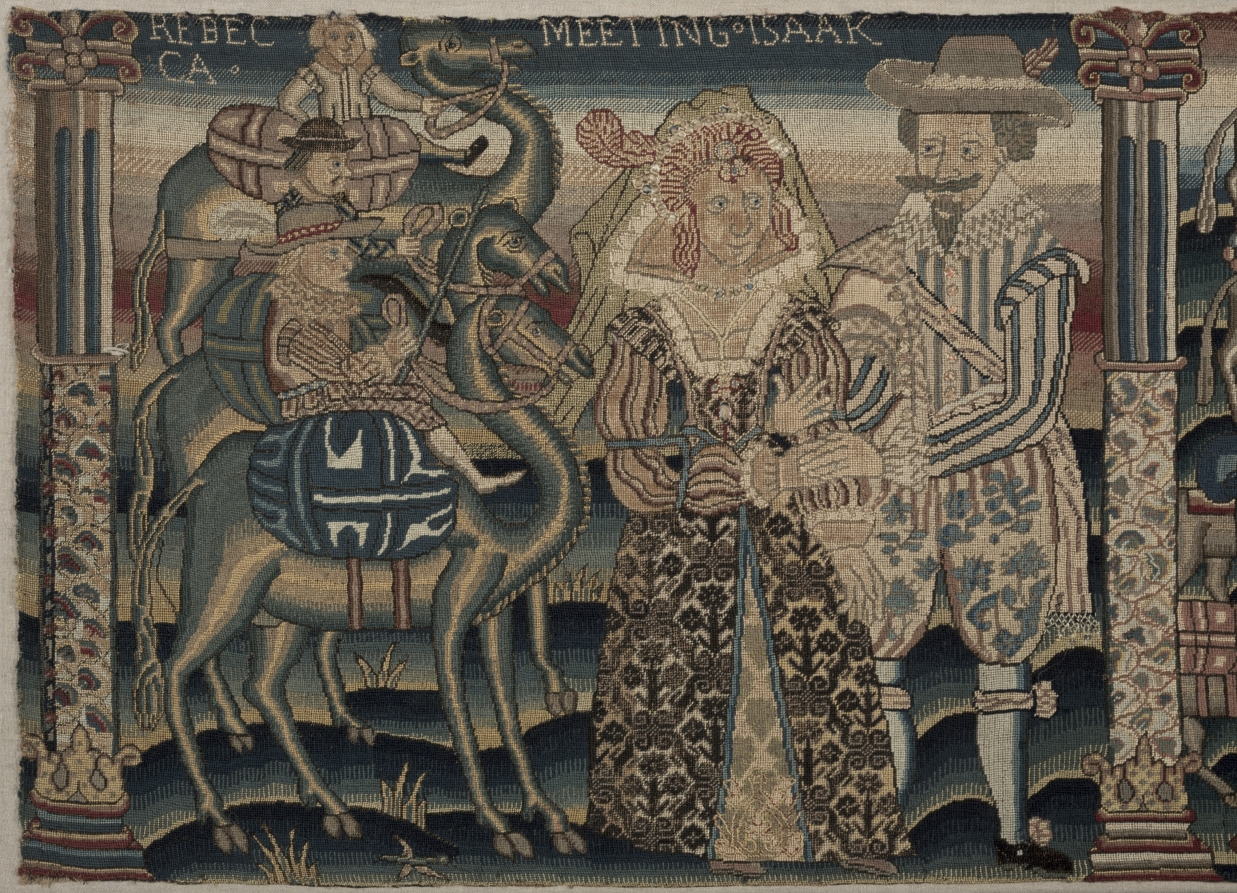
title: Section of an Embroidered Frieze: Rebecca Meeting Isaac, Abigail Meeting David with a Present, The Judgment of Solomon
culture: England, Period of Charles I (1625-1649), 17th century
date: 1625–1649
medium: petit-point embroidery; wool and silk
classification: Embroidery